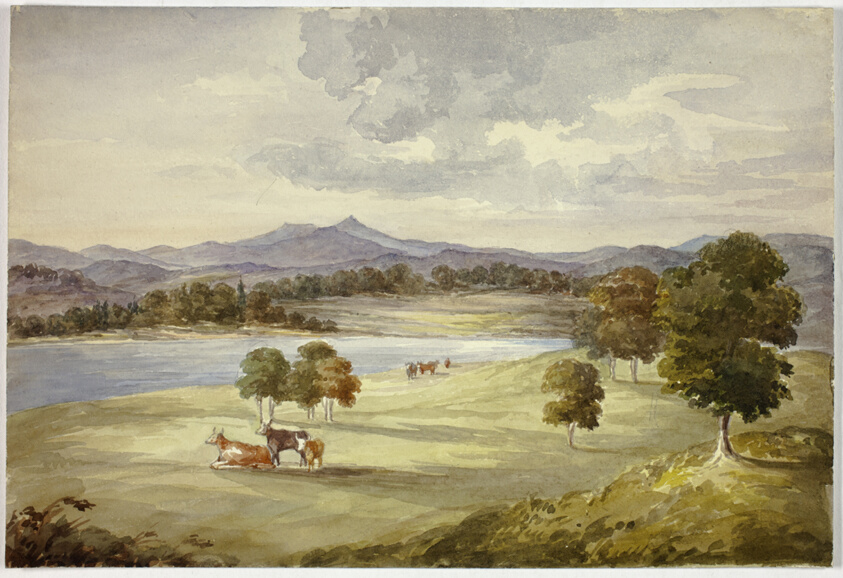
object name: Drawing and Watercolor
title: Cows in Landscape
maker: Elizabeth Murray (English, c. 1815-1882)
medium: Watercolor over traces of graphite on ivory wove paper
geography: England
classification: watercolor; drawings (visual works); prints and drawing